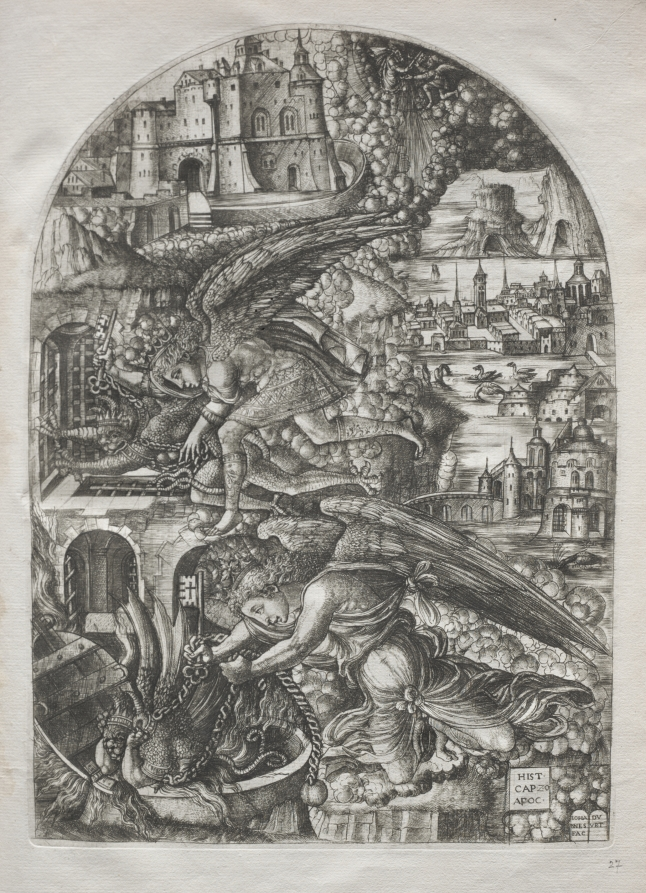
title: The Apocalypse: Satan Bound for a Thousand Years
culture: France, 16th century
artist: Jean Duvet (French, 1485–1561)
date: 1546–1555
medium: engraving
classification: Print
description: This print is part of a bound volume of works illustrating the a narrative of the Apocalypse, taken from the Revelation of Saint John in the Bible. The 23 engravings in the series occupied the artist for a number of years and represent his greatest artistic achievement. The museum's volume is one of only seven known complete sets. Jean Duvet was one of the first major printmakers in France and one of the most original artists of the 1500s. Although he worked mostly in the provincial city of Langres, he became aware of Italian art through the circulation of prints—notably those of Marcantonio Raimondi. His solidly modeled human figures reflect the influence of the Italian High Renaissance. Duvet, however, developed an idiosyncratic, highly artificial style with crowded compositions that ignore rational space in favor of ornamental surface patterns.